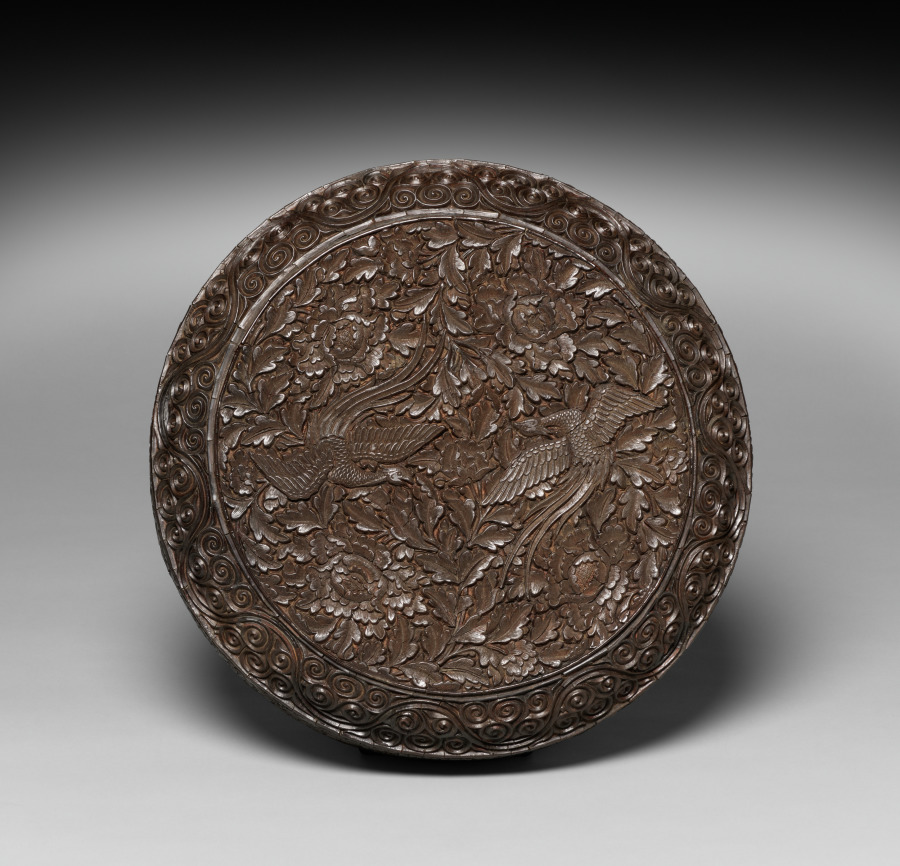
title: Round Box with Bird and Peonies Design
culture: China, late Southern Song (1127–1279) to early Yuan dynasty (1271–1368)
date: c. 1300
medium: carved lacquer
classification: Lacquer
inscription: 山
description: The carved lacquer box and lobed silver container nearby both feature pairs of birds and flowers on their covers. There is a striking similarity in decoration, shape, and aesthetic appeal. Both boxes suggest that successful designs and shapes circulated among craftsmen, workshops, and beyond regional borders.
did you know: The footring is carved with a band of continuous key-fret, above which is another band of spiral scroll pattern